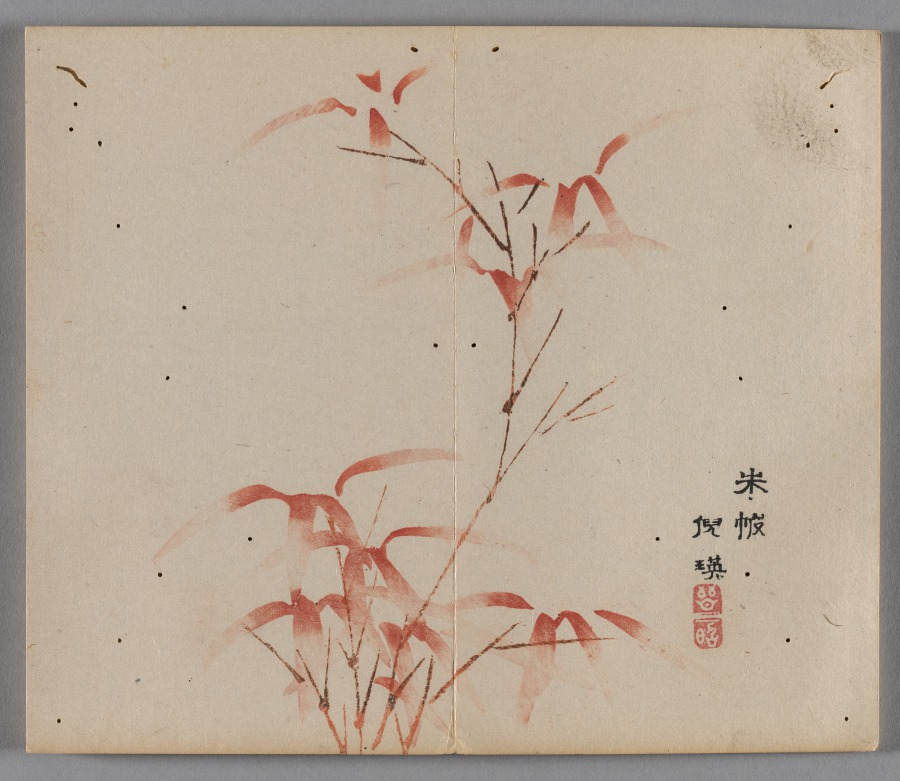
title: Ten Bamboo Studio Painting and Calligraphy Handbook (Shizhuzhai shuhua pu): Bamboo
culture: China, Qing dynasty (1644-1911)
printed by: Hu Zhengyan (Chinese, c. 1584–1674)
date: 1633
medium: Woodblock-printed book; ink and colors on paper; first edition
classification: Print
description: Color printing reached a level of perfection in the early 1600s, as seen in this Ten Bamboo Studio Collection of Calligraphy and Painting and the Mustard Seed Garden Manual of Painting (printed 1679 and 1701). The painterly quality, precision in registering (aligning) the woodblocks, and harmonious colors made them the most successful color print editions in Chinese history. Both editions were printed and compiled in Nanjing, spread nationwide, and had a great impact on the arts in Japan and Korea.